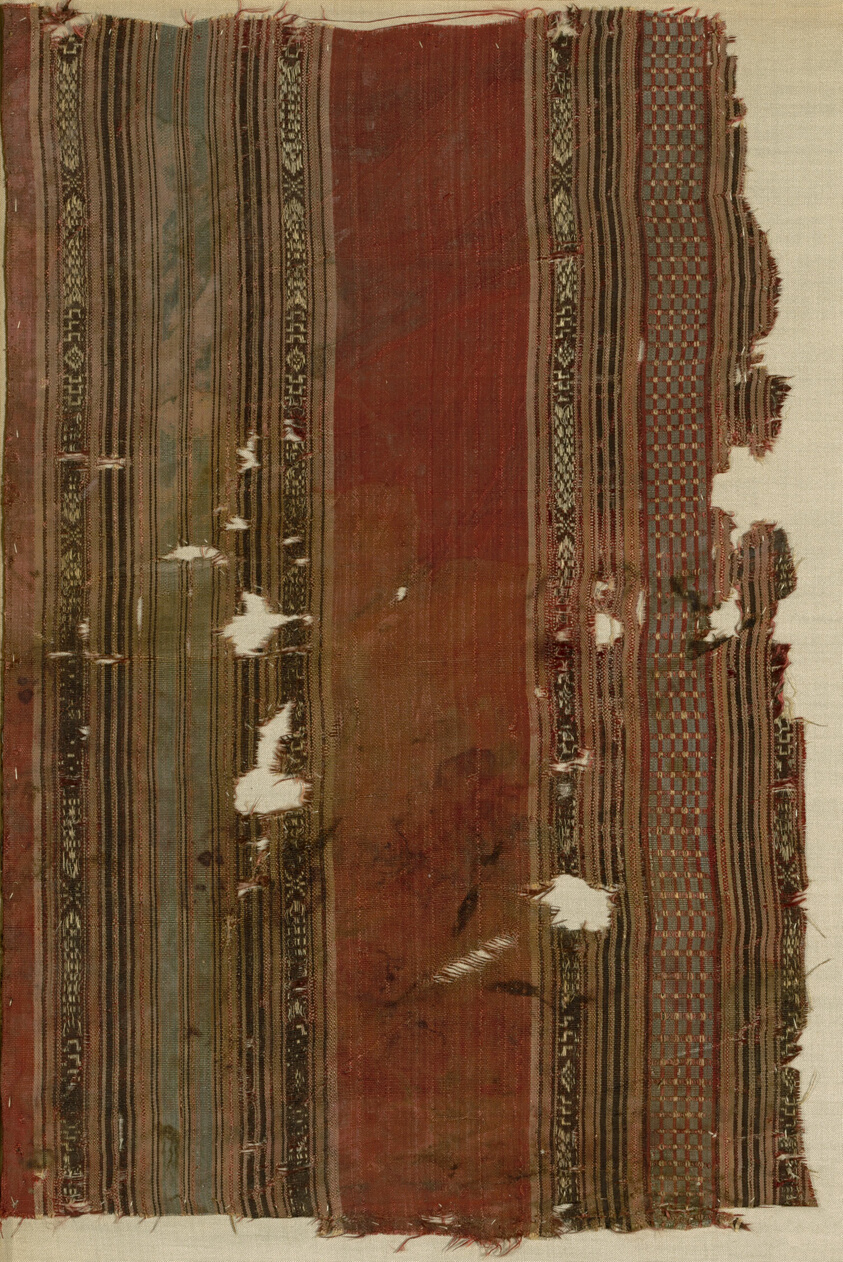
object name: Textile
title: Fragment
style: ayyubid, fatimid, mamluk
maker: Egypt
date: Arab period (641–969)/Fatimid period (969–1171)/Ayyubid period (1171–1250)/ Mamluk period (1250–1517), 9th/13th century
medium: Silk, compound weave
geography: Egypt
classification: textile; weaving